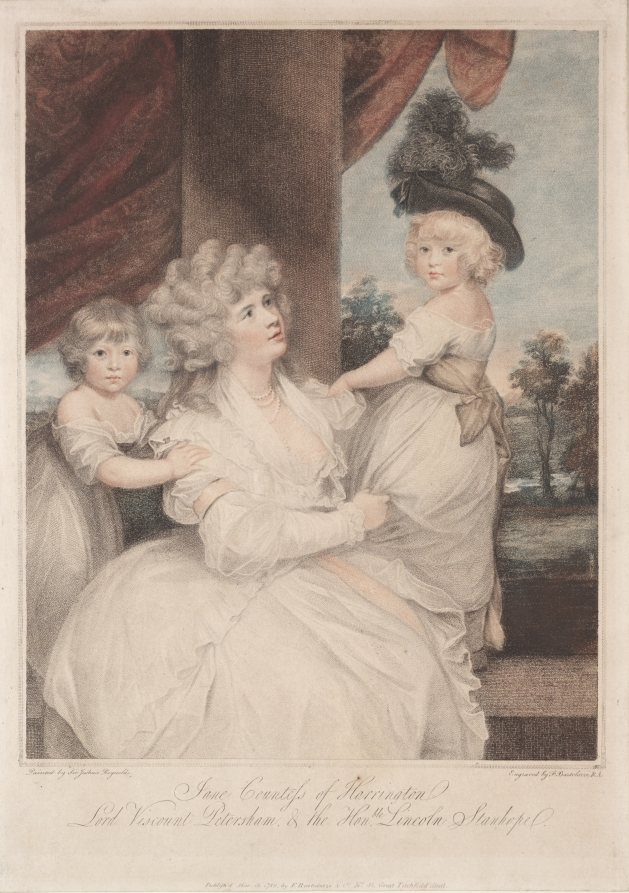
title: Jane, Countess of Harrington and Her Children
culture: England, 18th century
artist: Francesco Bartolozzi (British, 1727–1815)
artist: after Joshua Reynolds (British, 1723–1792)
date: 1789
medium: color stipple engraving and etching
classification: Print